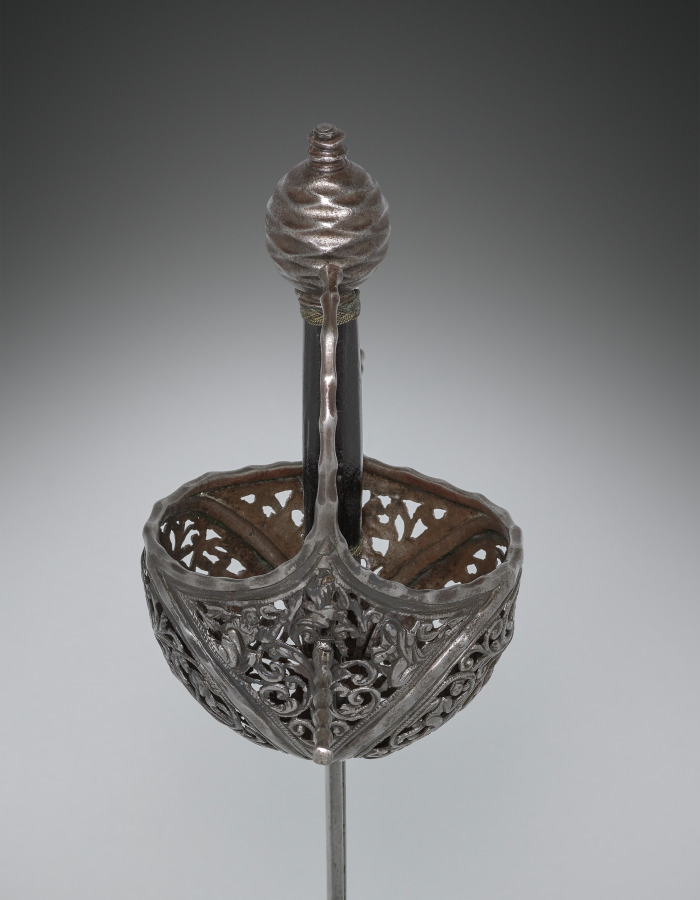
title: Cup-Hilted Rapier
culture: Italy, Milan?, 17th century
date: c.1610–30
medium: steel, pierced, chased and chiseled; wire ferrules on leather-covered wood grip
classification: Arms and Armor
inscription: inscribed on blade: FPNDRITH (on one face) RDFTPHNI (on the other)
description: The rapier was a sword worn with civilian dress and used in duels. The term rapier derives from a 16th-century French word rapière, which in turn derived from the Spanish espada ropera, or “dress sword.” The rapier was a light weapon with a straight double-edged and pointed blade that, with the development of the art of fencing in the 1500s and 1600s, gradually became narrower and lighter, and thus suitable for thrusts only. With the new technique of swordplay emphasizing the point of the blade, sword guards became more complex to protect the duelist’s unarmored hand. These elaborate guards were frequently decorated by various techniques—chiseling, bluing, russeting, and damascening.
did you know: Over time the blade of a rapier became longer, based on a belief that a longer blade made it easier to hit one's adversary and, at the same time stay beyond the reach of his weapon.